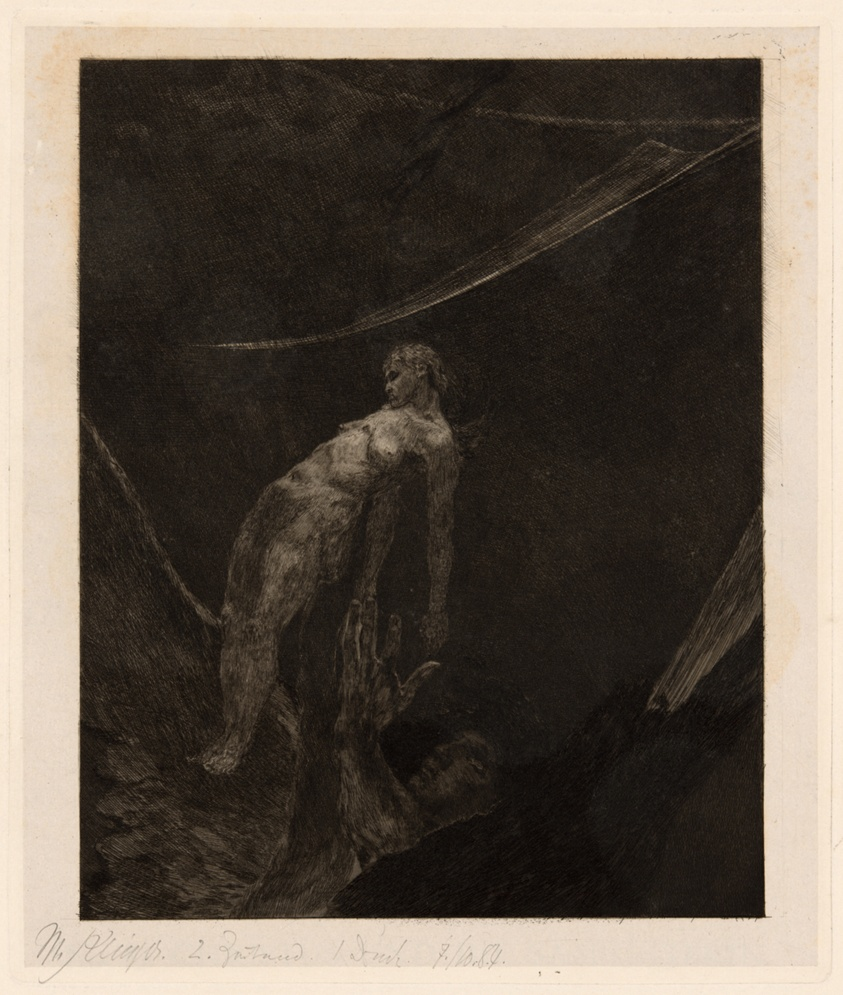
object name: Print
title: Back into Nothingness, plate fifteen from A Life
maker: Max Klinger (German, 1857-1920); printed by Otto Felsing (German, 19th century)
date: 1884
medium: Aquatint and etching on ivory China paper laid down on cream laid paper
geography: Germany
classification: aquatint; print; prints and drawing